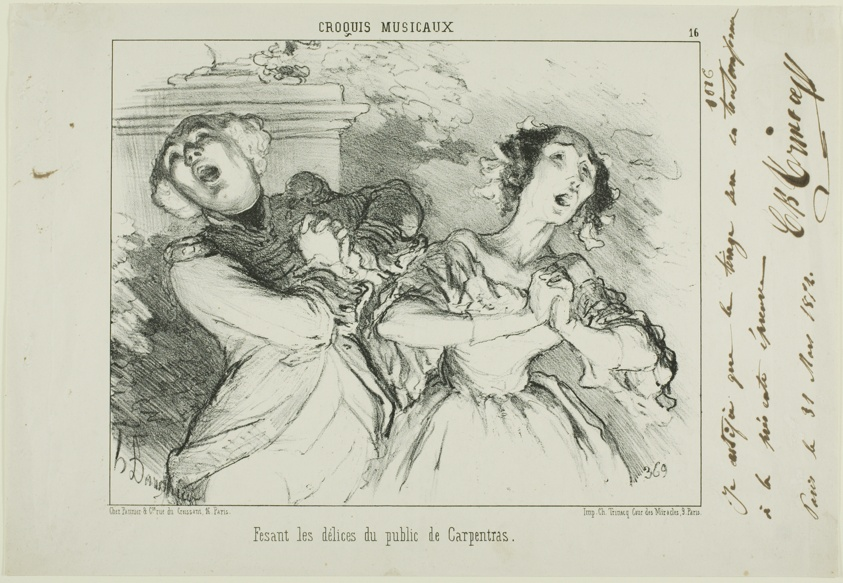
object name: Print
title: Giving the public the delights of Carpentras, plate 16 from Croquis Musicaux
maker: Honoré Victorin Daumier; French, 1808-1879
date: 1852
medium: Lithograph in black on white wove paper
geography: France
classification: lithograph; print; prints and drawing